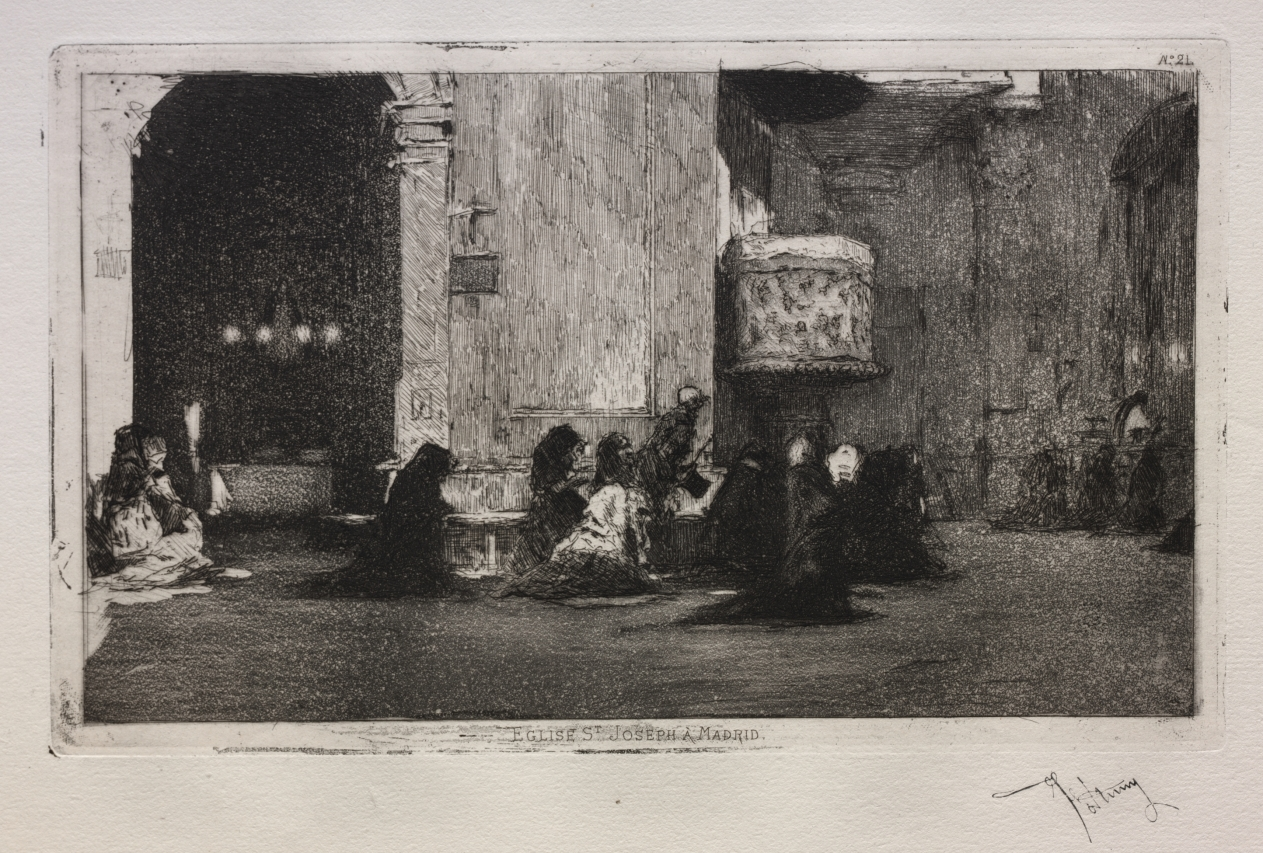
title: Saint Joseph Church, Madrid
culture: Spain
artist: Mariano Fortuny (Spanish, 1838–1874)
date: c. 1860–70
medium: etching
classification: Print